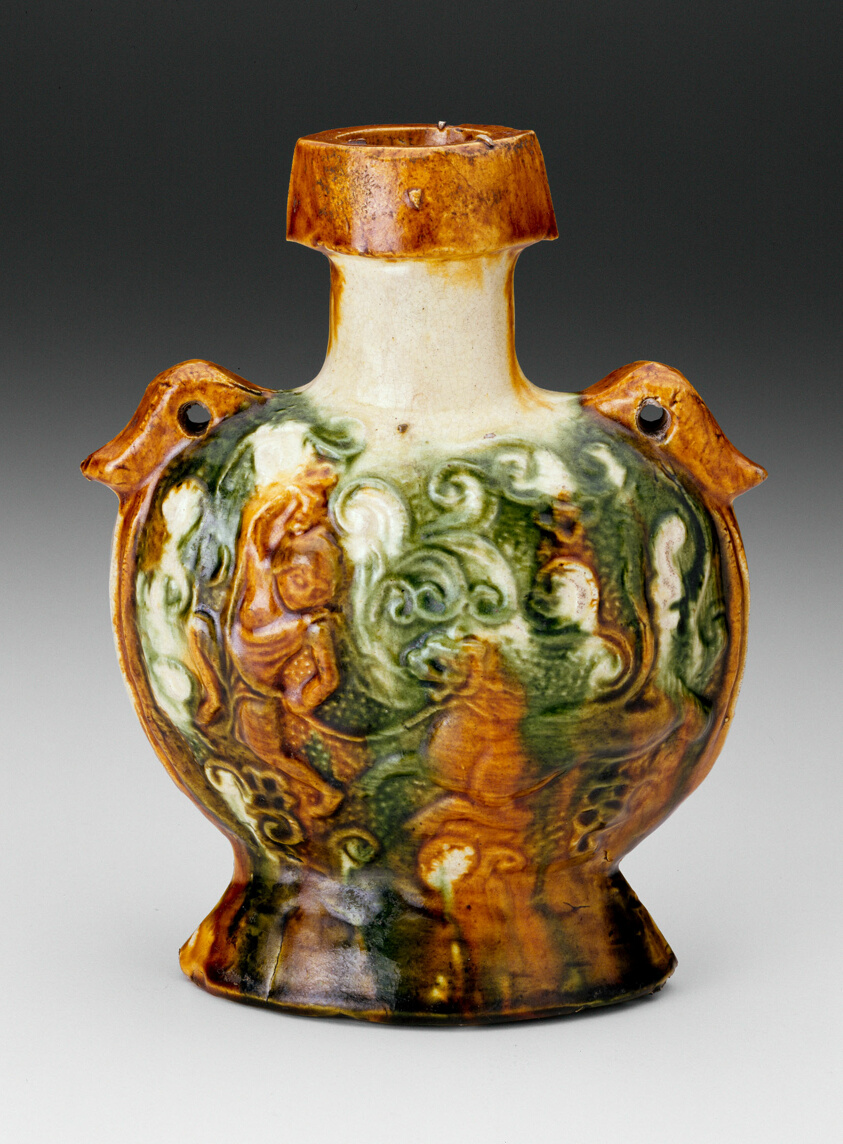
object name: Vessel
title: Pilgrim Flask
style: Chinese (culture or style)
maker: China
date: Tang dynasty (618–907), first half of 8th century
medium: Earthenware with three-color (sancai) lead glazes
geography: China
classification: earthenware; asian art; ceramics; decorative arts